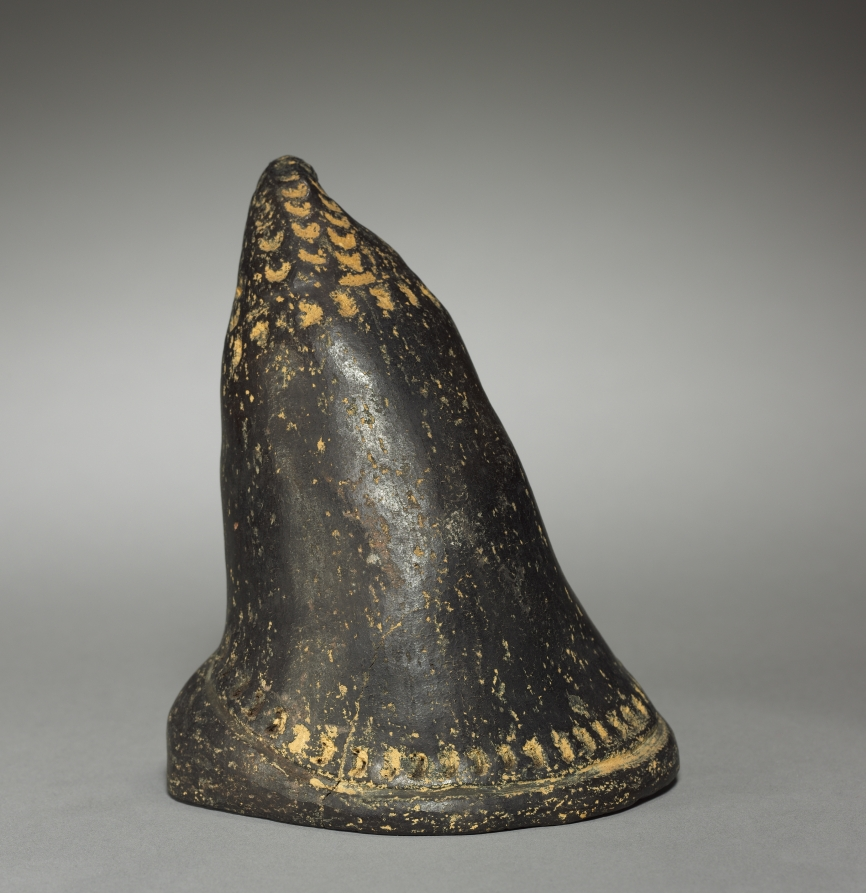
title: Ornament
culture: Colombia, 19th-20th century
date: before 1921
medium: black ware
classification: Ceramic